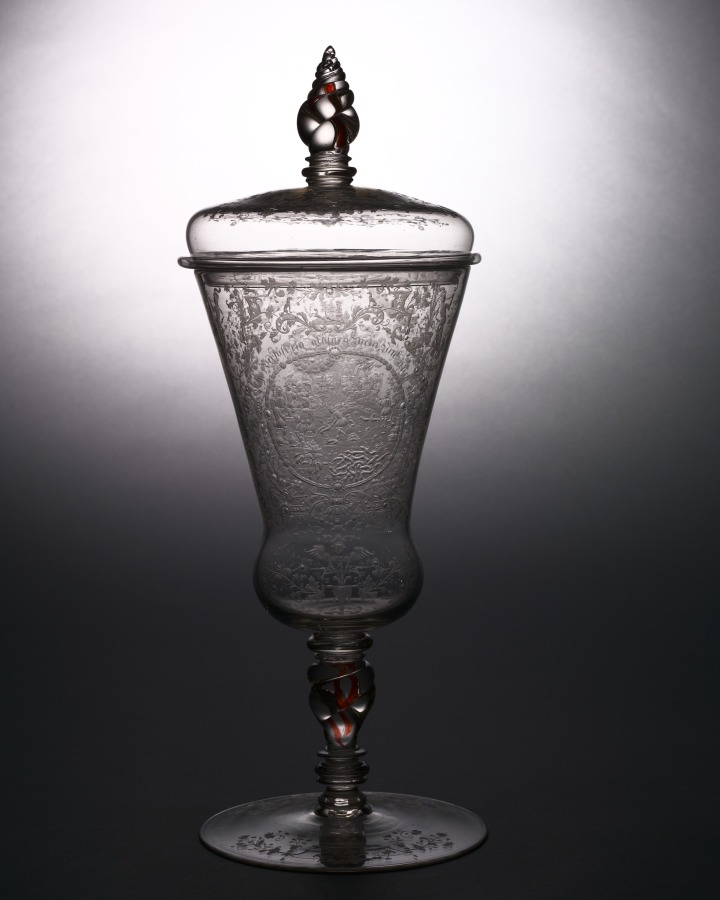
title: Standing Cup with Cover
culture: Bohemia, 18th century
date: c. 1715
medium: glass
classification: Glass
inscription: the German inscription engraved around the hunting scene translates as: When sorrow torments us enjoy a glass of wine and also the joy of a hunt; engraved on the opposite side: F.A.K.J.P.V.C.F.Z.S. (Friedrich August Keonig in Polen und Chur Fuerst zu Sachsen).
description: Engraved with arms of Saxony-Poland and Hunting Scene.